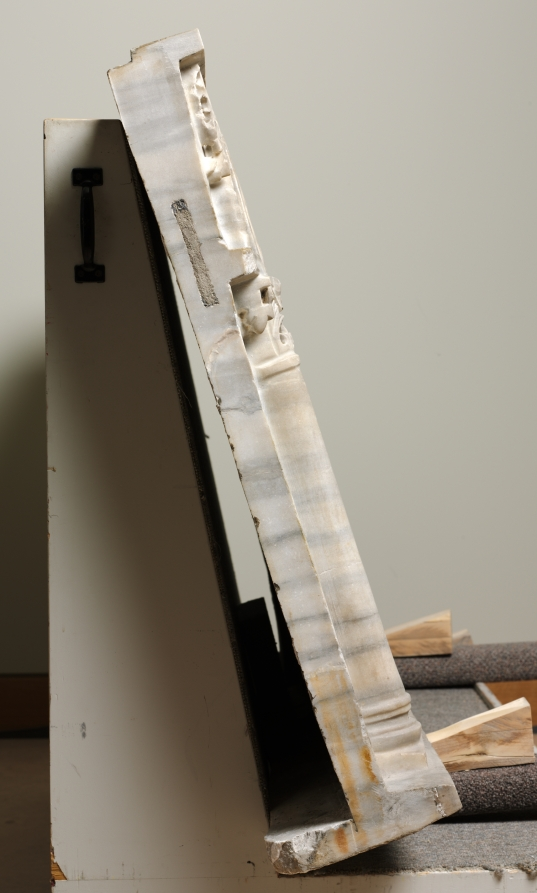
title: Altar Front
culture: early Byzantium, Constantinople or Ravenna, Byzantine period, 6th century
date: c. 540–600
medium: marble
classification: Sculpture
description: This carved marble panel resembles the front of an Early Byzantine sarcophagus, or coffin. While its decoration is typical of those produced in the Italian city of Ravenna during the 500s, its size is considerably smaller, indicating that the panel may instead have been made as an altar front. It is likely that the small window between the center columns with its opened curtains once allowed the faithful to contemplate a precious reliquary placed inside. The decorative repertoire of the panel includes both architectural forms--arches, pediments, and columns--and a number of symbols commonly found in Early Christian art including scallop shells, lambs, palms, and crosses that represent the concepts of life, the sacrifice of Christ, victory over death, and eternal life.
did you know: This marble altar was likely in a Byzantine church that was opulently decorated with mosaics, rich textiles, and gilded lamps. Worshipers would have witnessed the rituals of faith that occurred at the altar, enshrined behind a barrier called a templon, and accessible only to the clergy.